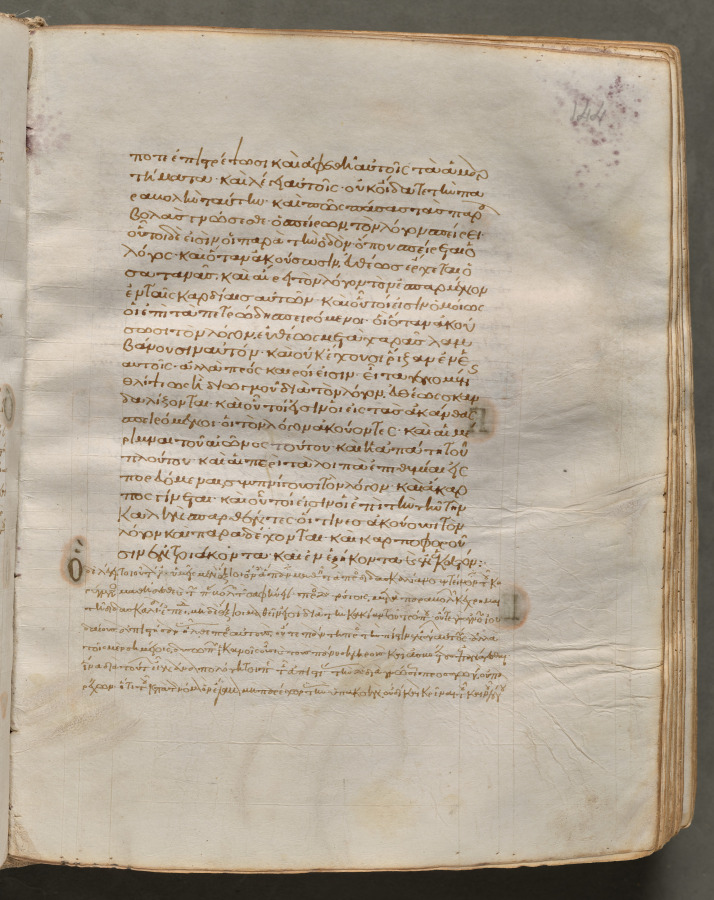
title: Text, folio 144 (recto), from a Gospel Book with Commentaries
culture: Byzantium, Constantinople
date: c. 1000–1100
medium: ink, tempera, and gold on vellum; leather binding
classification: Bound Volume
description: Each of the four gospels in this book opens on a page with brilliantly illuminated borders depicting the author of the text as well as birds-principally peacocks, symbols of the immortality of the soul-and fountains, representing the fountain of life and the salvation of the soul. This volume consists of 428 leaves with texts in Greek. Its level of sophistication suggests that it was probably written and decorated in a monastery in Constantinople.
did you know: Gospel Books were carried in procession through Byzantine churches.